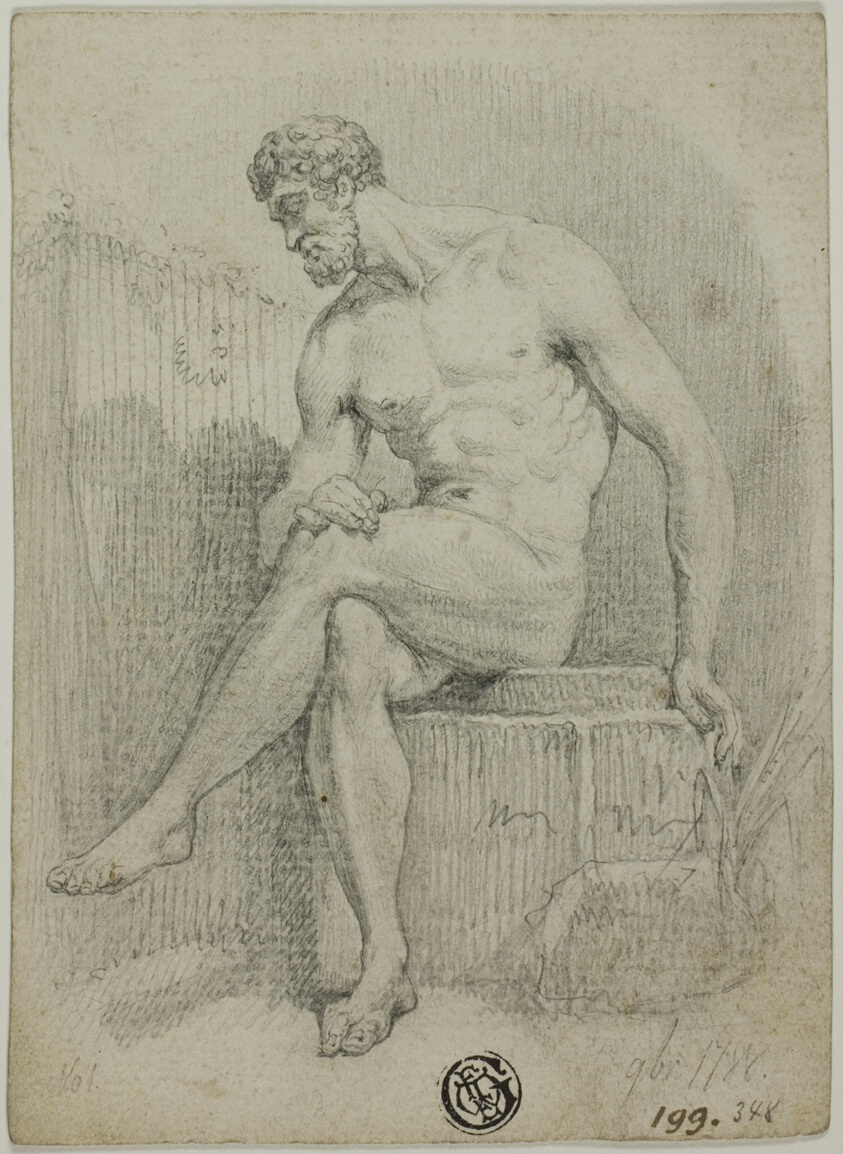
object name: Drawing and Watercolor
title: Seated Male Nude (from statue)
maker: Unknown Artist; French, 18th century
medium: Graphite on ivory laid paper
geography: France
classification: graphite; drawings (visual works); prints and drawing